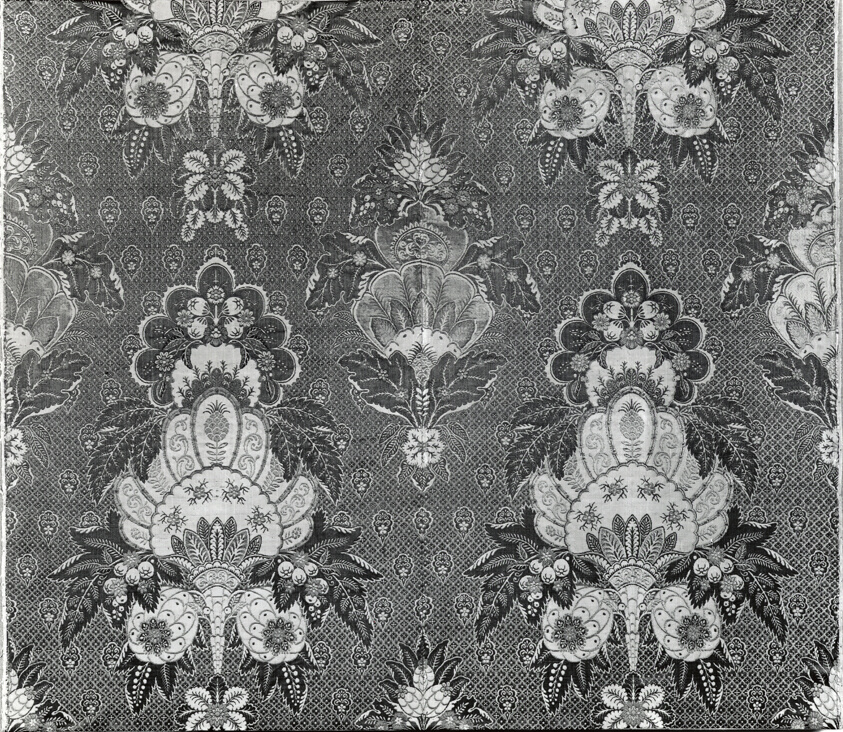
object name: Textile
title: Panel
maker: France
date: 1720/29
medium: Silk, warp-float faced 7:1 satin weave with supplementary patterning and brocading wefts bound in twill interlacings and self-patterning ground wefts tied by supplementary binding warps in plain interlacings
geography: France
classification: textile; weaving